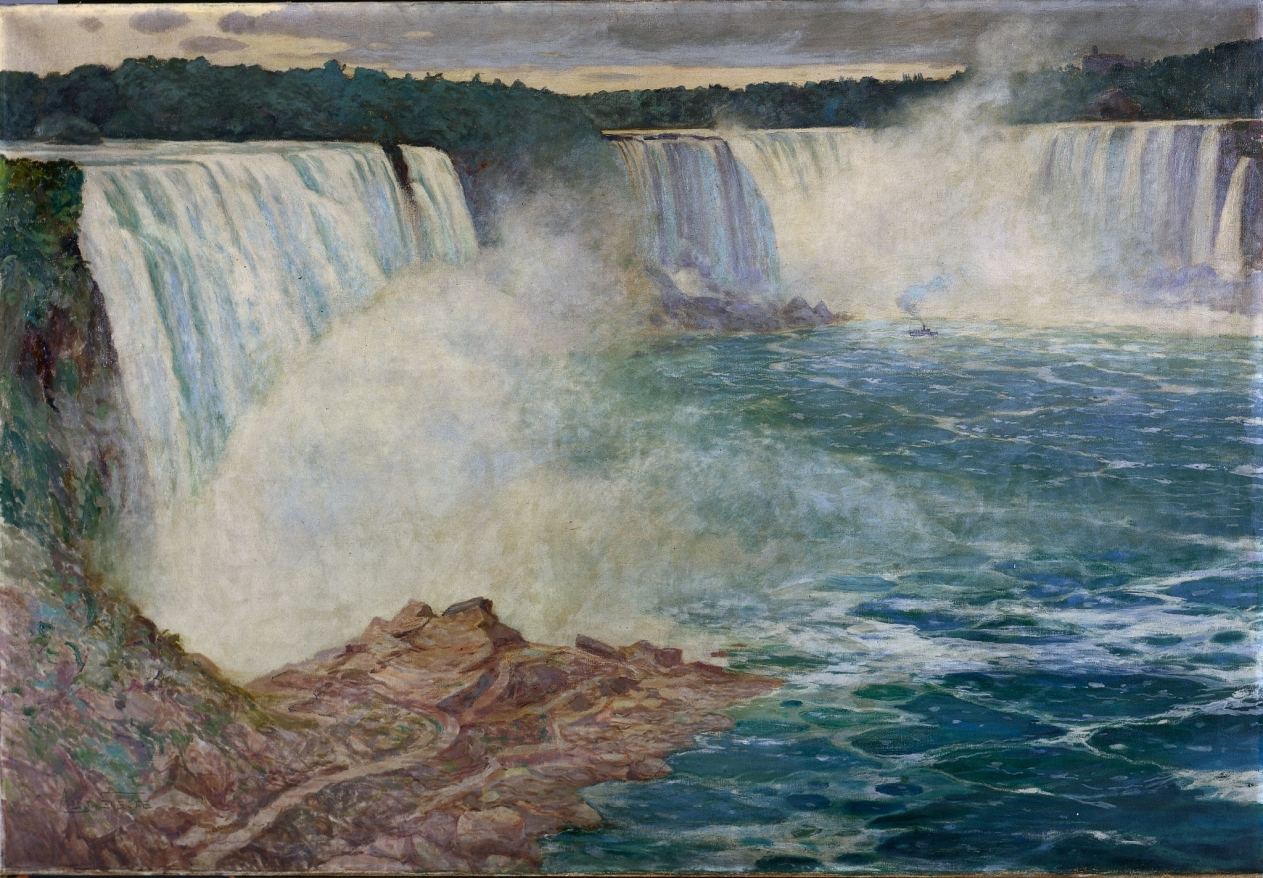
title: Niagara Falls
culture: America, Ohio, Cleveland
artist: Augustin Satra (American, 1877–1909)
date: c. 1906–1909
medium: oil on canvas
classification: Painting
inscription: Signed lower left: "Aug. Satra"